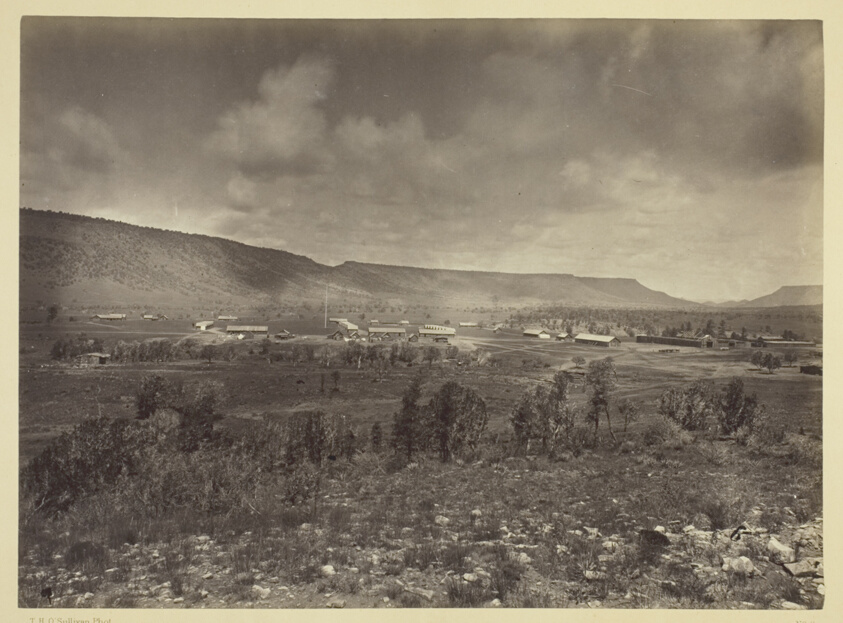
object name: Photograph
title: Distant View of Camp Apache, Arizona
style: 19th century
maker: Timothy O'Sullivan (American, born Ireland, 1840–1882)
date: 1873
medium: Albumen print, from the album "Geographical & Geological Explorations & Surveys West of the 100th Meridian," vol. 1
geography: United States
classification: albumen silver print; photographic process; photography; photograph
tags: Collected by Hugh Edwards